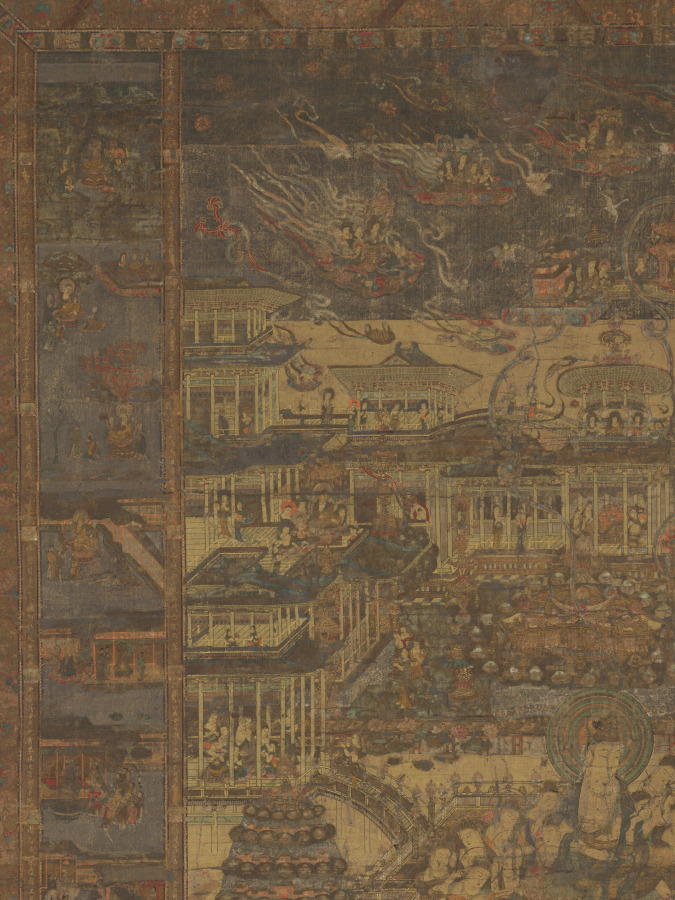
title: Taima Mandala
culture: Japan, Kamakura period (1185–1333)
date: early 1300s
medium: hanging scroll; ink, color, and gold on silk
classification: Painting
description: This painting is a copy after an 8th-century woven mandala belonging to the temple Taimadera. The composition is based on a sacred text that describes the Buddha Shakyamuni’s explanation of Amida’s Pure Land to Queen Vaidehi, as well as his instructions to her on visual meditation upon the Pure Land. The Pure Land appears at the center of the painting. To the left is the story of Queen Vaidehi’s encounter with Shakyamuni, and to the right are the scenes she is given to visualize. The bottom illustrates the nine levels of birth that can be attained in the Pure Land.